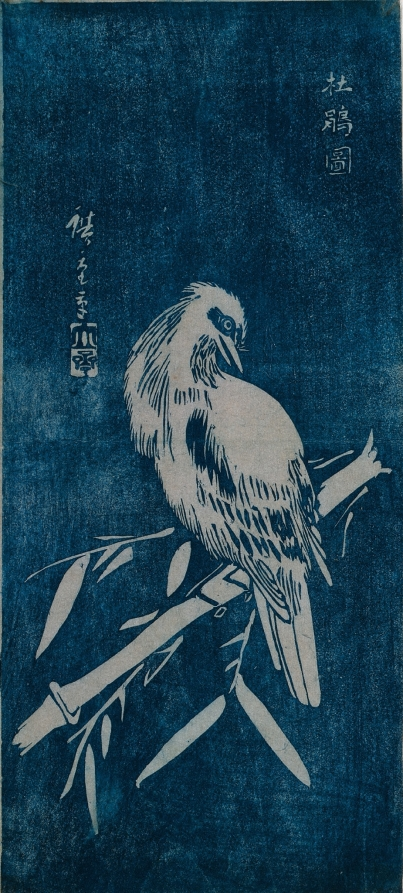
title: Cuckoo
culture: Japan, Edo period (1615–1868)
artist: Utagawa Hiroshige (Japanese, 1797–1858)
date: 1840s or later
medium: color woodblock print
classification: Print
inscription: Signature: Hiroshige Artist Seal: Ryusai